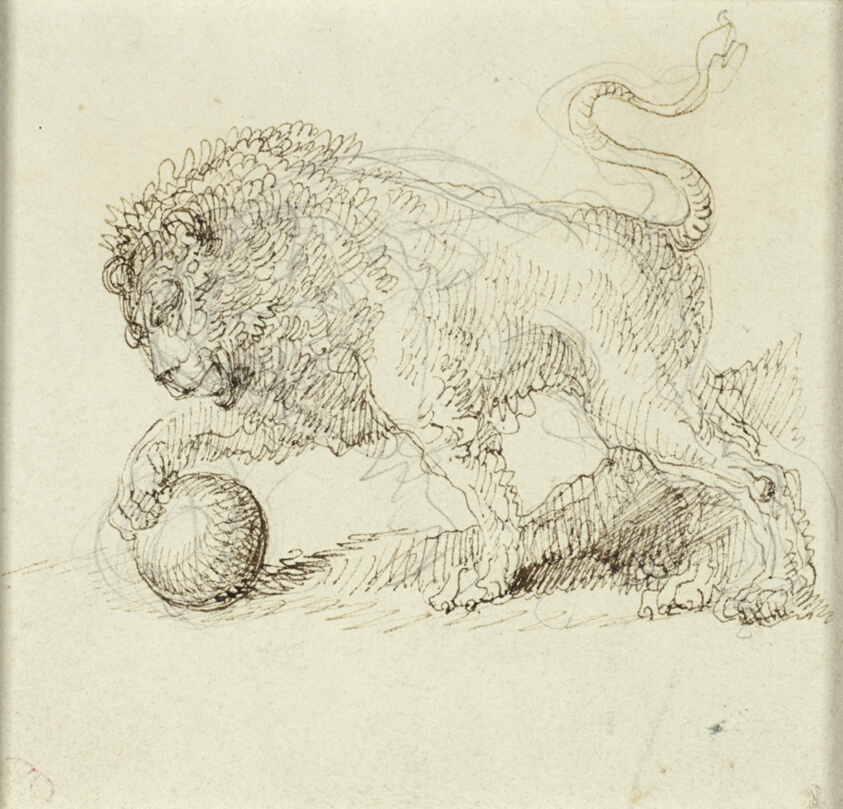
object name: Drawing and Watercolor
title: Lion with Ball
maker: Giuseppe Bernardino Bison (Italian, 1762–1844)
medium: Pen and brown ink, with graphite, on off-white wove paper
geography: Italy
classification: drawings (visual works); prints and drawing